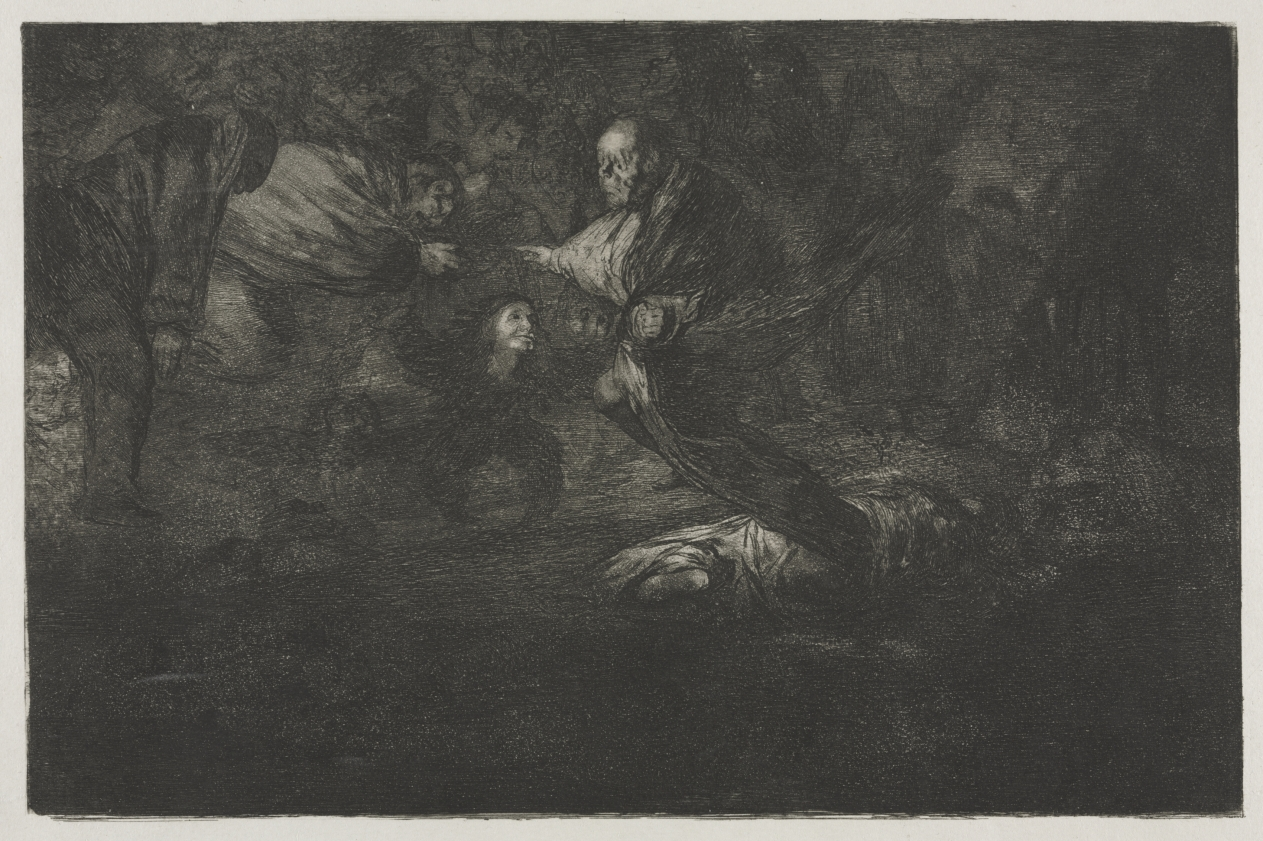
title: The Proverbs: God Creates Them and They Join Up Together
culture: Spain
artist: Francisco de Goya (Spanish, 1746–1828)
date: 1864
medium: etching and aquatint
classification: Print